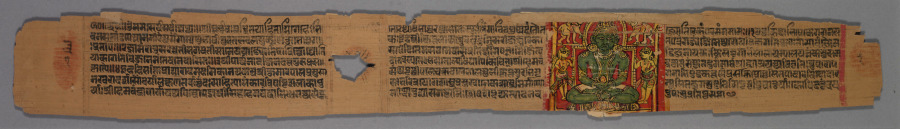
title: Folio 1, from a Great Poem about Twos (Dvyashraya Mahakavya) of Hemachandra with Commentary by Abhayatilaka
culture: Western India, Gujarat, possibly Patan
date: 1428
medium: Gum tempera and ink on palm leaf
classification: Painting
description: The first two folios of this manuscript commentary have adjoining paintings: the first is the green image of Parshva, a liberated being known as a Jina, and the second depicts the author of the text, Hemachandra (1088–1173), as a monk with his royal patron Kumarapala (reigned 1143–1172). The text of this manuscript illustrates grammatical points of both Sanskrit and Prakrit—a living language derived from Sanskrit—with examples of the wondrous deeds of his kings.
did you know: Hemachandra was a celebrated poet, historian, grammarian, philosopher, and theologian of medieval India.